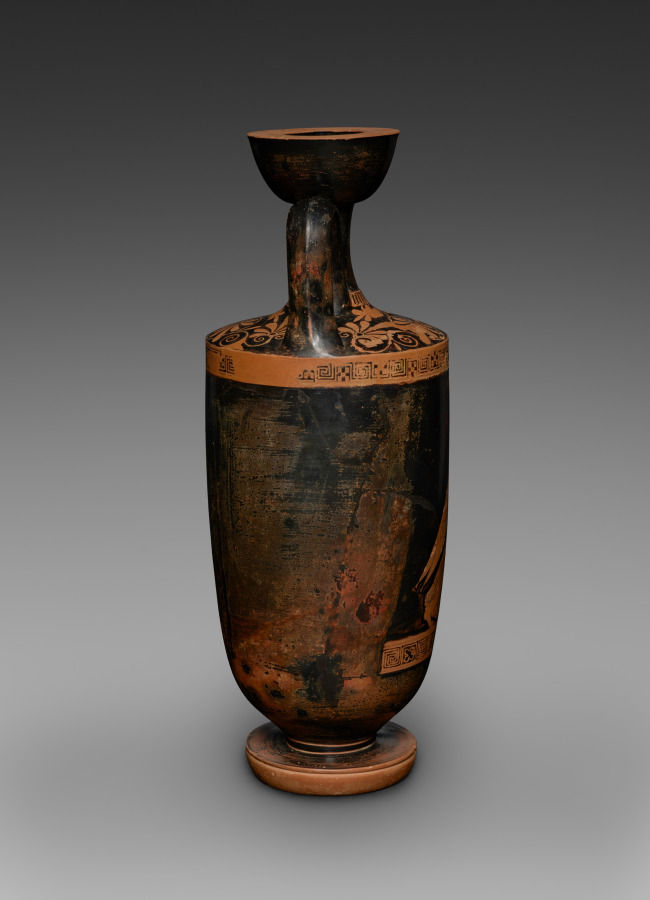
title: Red-Figure Lekythos (Oil Vessel): Athena Slaying Giant (body); Satyr between Maenads (shoulder)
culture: Greek, Attic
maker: attributed to Berlin Painter (Greek, Attic, active c. 505–460 BC)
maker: attributed to Painter of Goluchow 37 (Greek, Attic, active c. 490–460 BC)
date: c. 490 BCE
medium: ceramic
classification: Ceramic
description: The two separate areas of figural decoration on this vase have been attributed to different painters: the small satyr and maenads on the shoulder to the Berlin Painter; and the larger figures of Athena and the slain Giant Enkelados on the body to the Painter of Goluchow 37. Scholars have named these two painters, whose actual names remain unknown, after other vases they have painted, now in Berlin and Warsaw. The victory of Athena and the Olympian gods over the Giants has been interpreted as a metaphor for the Greek victory over the Persians around the time this vase was made. Thus, although Enkelados appears as a fully armed warrior, he falls in utter and complete defeat—bleeding from multiple wounds, eyes rolling back, sword dropping from his hand.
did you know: First attributed to Douris, this vase is now thought to have been painted by two anonymous painters.